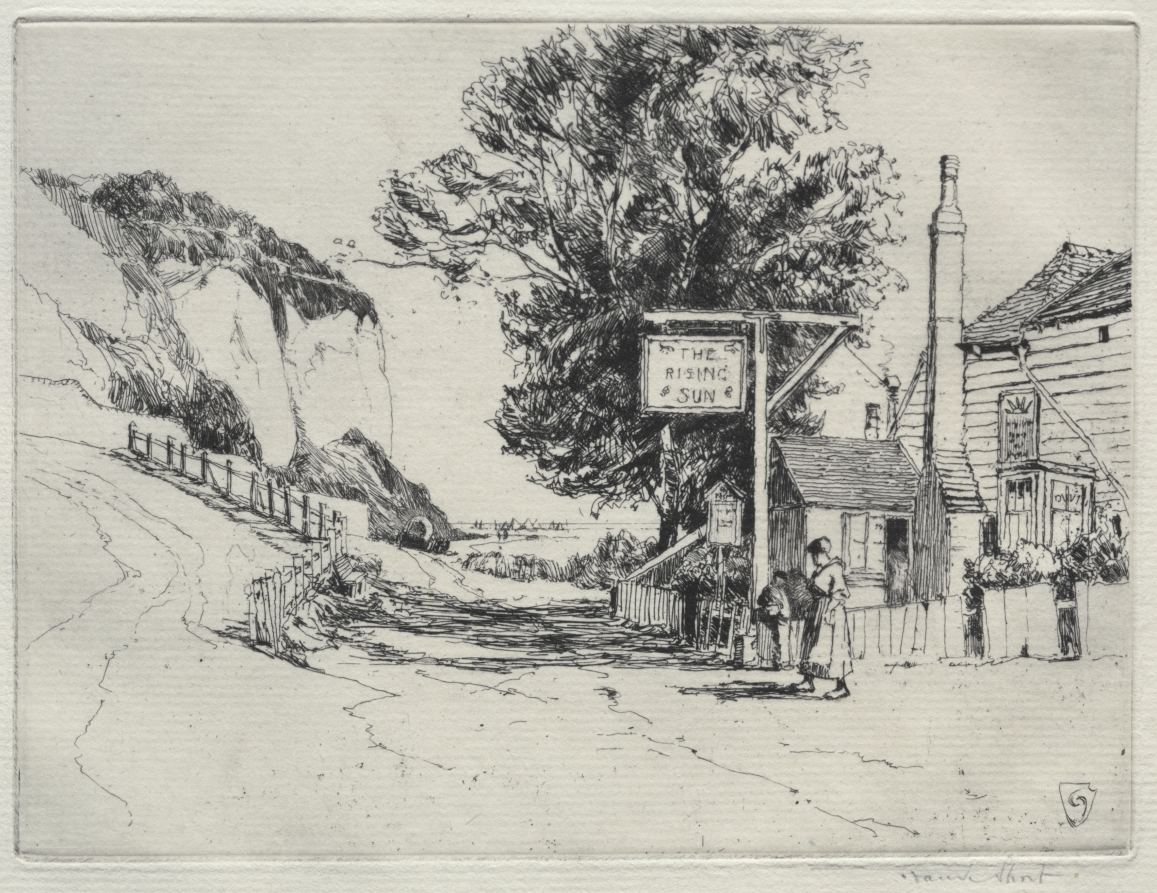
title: The Rising Sun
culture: England, late 19th-early 20th century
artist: Frank Short (British, 1857–1945)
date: 1922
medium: etching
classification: Print